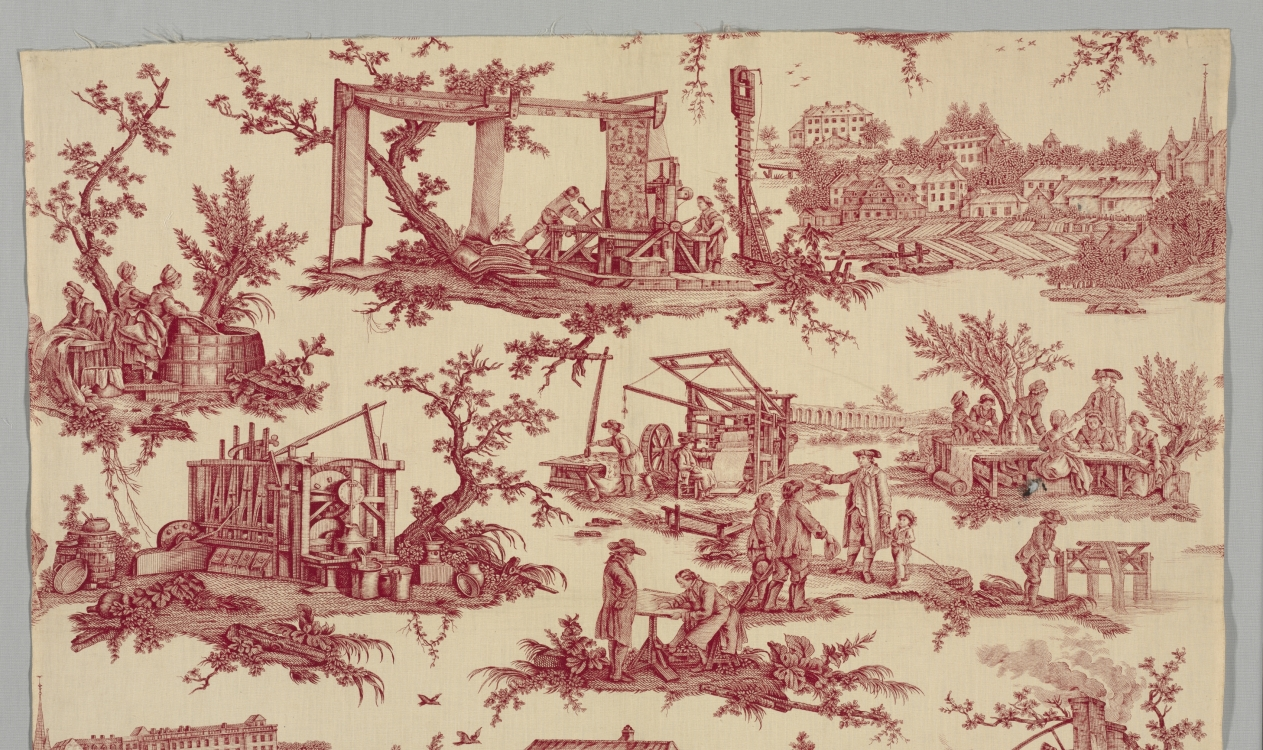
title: Les Travaux de la Manufacture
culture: France, Late 18th century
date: c. 1790s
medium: plain weave cotton, printed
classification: Textile